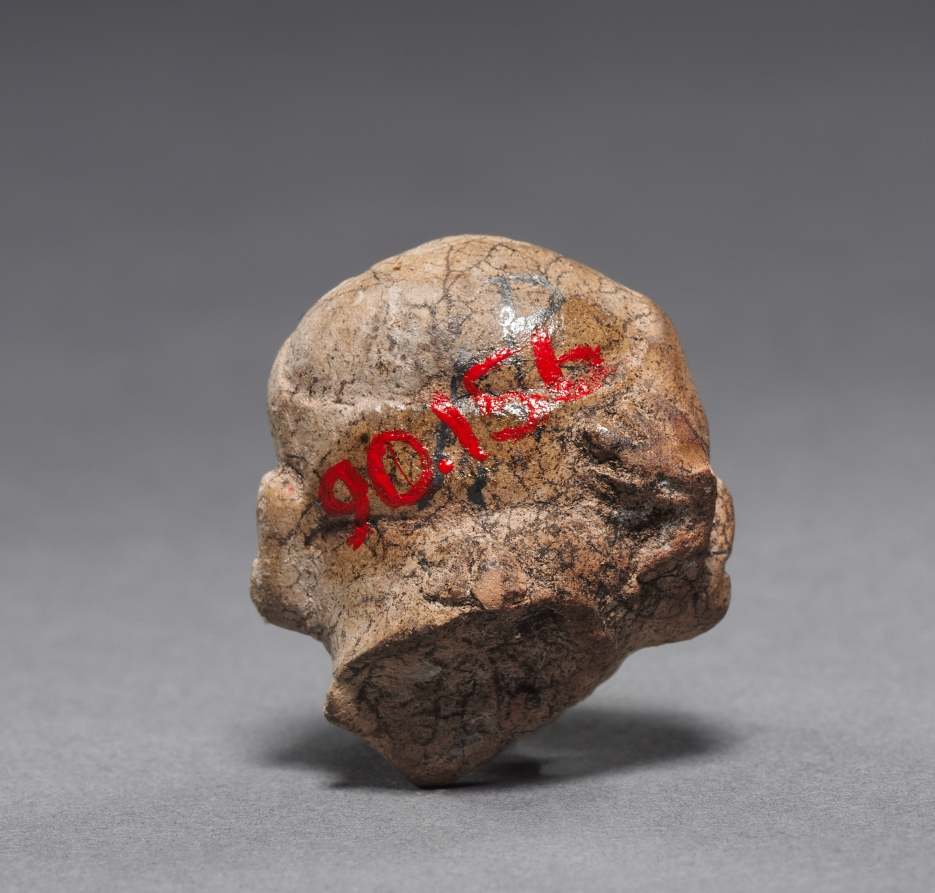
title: Figurine Head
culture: Mexico or Central America, Maya(?), Middle Preclassic period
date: c. 600–200 BCE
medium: pottery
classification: Sculpture